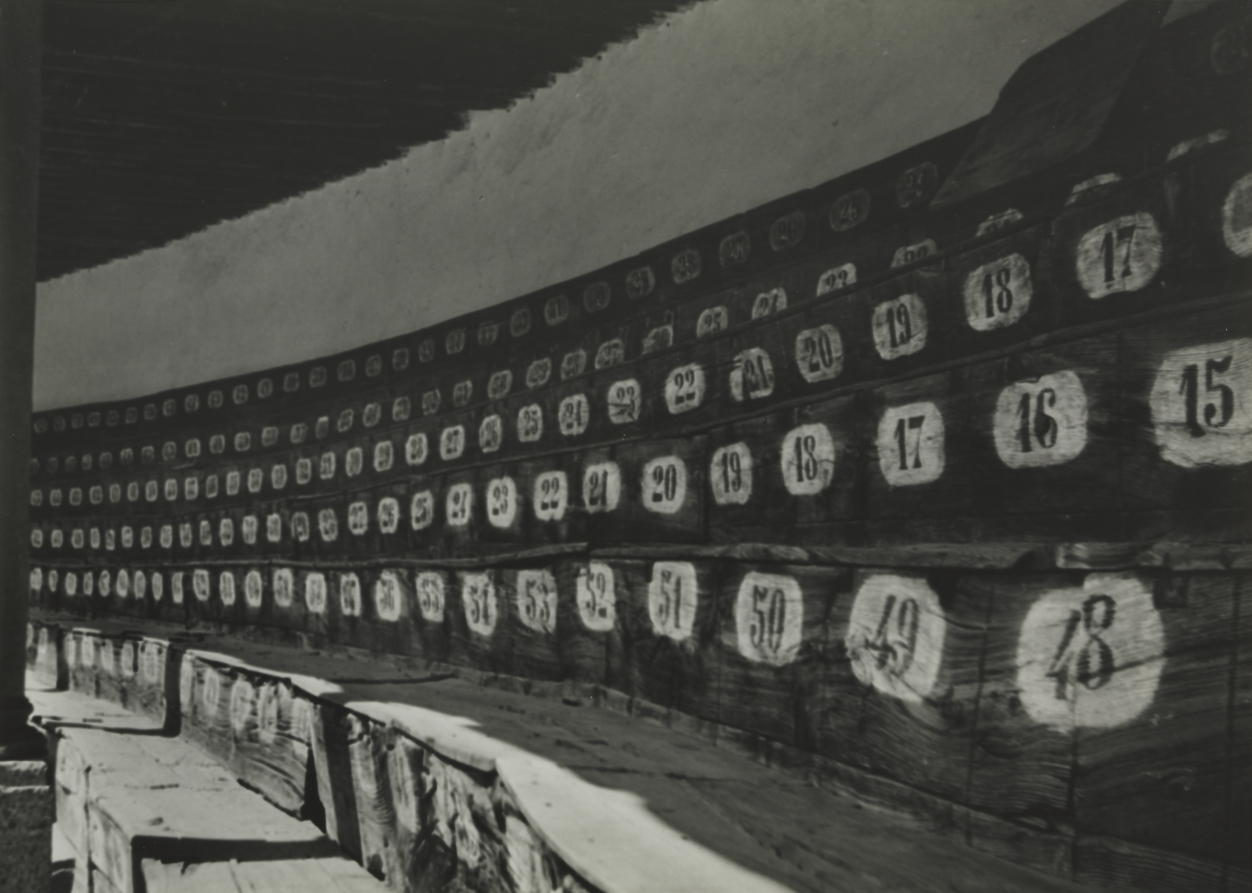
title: The Bull Ring, Ronda, Spain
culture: England, 20th century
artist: Paul Nash (British, 1889–1946)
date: 1934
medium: gelatin silver print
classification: Photograph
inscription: Written in black ink on verso: "From the original negative/of Paul Nash-/Illustrated in his book of/his photographs,/'Fertile Image'/Plate 44./The Bull Ring./Ronda, Spain./Bough from Margaret/Nash-1951." Written in pencil: "44" Written in blue ink: "Mrs. Paul Nash/Copyright"